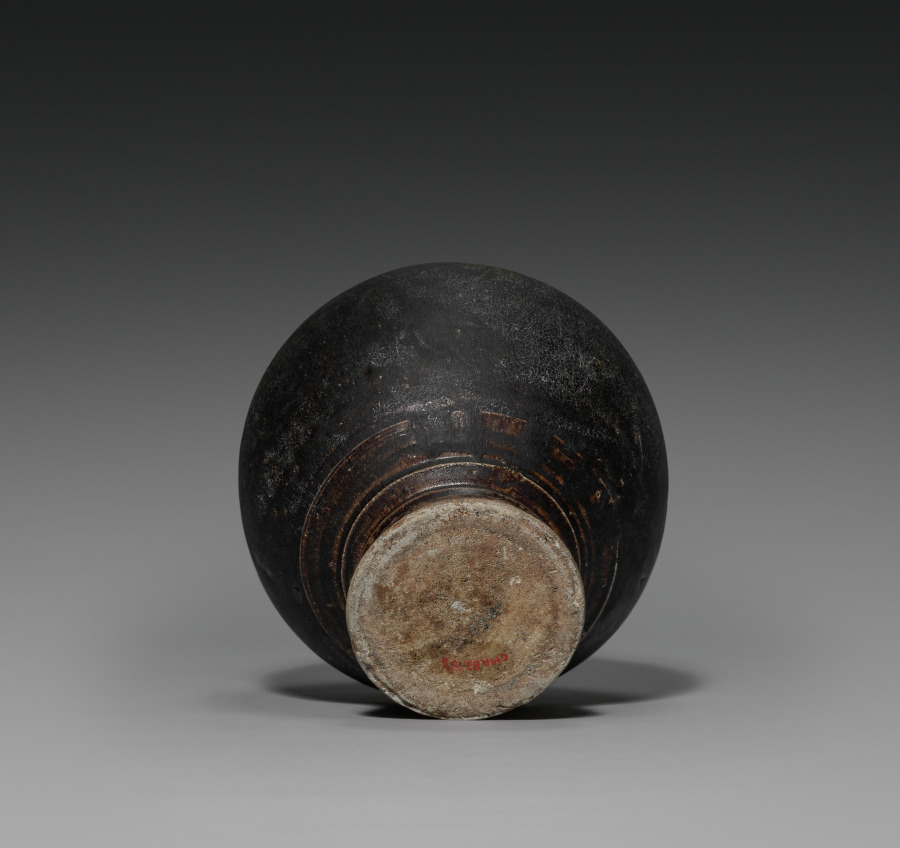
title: Jar in the Shape of a Fruit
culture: Cambodia, Northeast Thai kiln, Khmer Ware, Angkor Wat/Bayon period, 12th century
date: 1100s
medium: glazed pottery with brown slip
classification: Ceramic